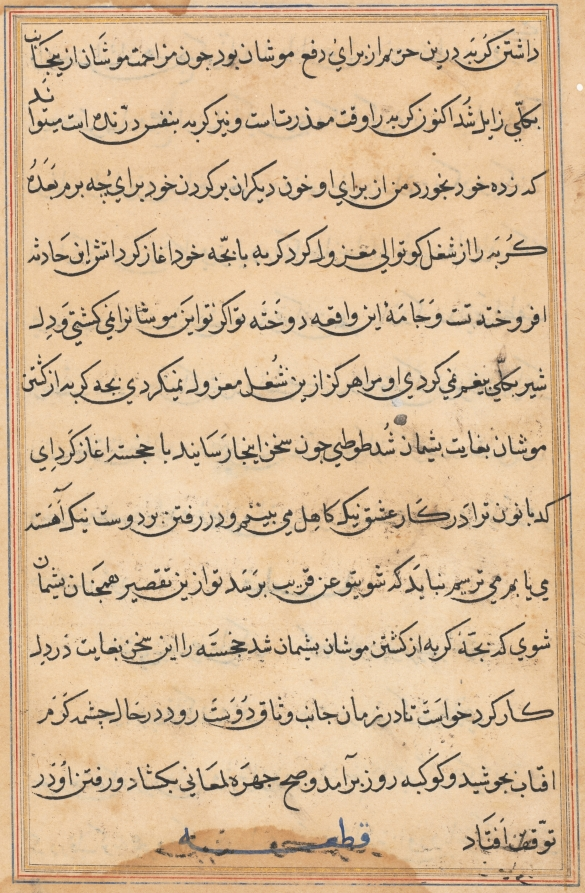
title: Page from Tales of a Parrot (Tuti-nama): text page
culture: Mughal India, court of Akbar (reigned 1556–1605)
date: c. 1560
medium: gum tempera, ink, and gold on paper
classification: Painting